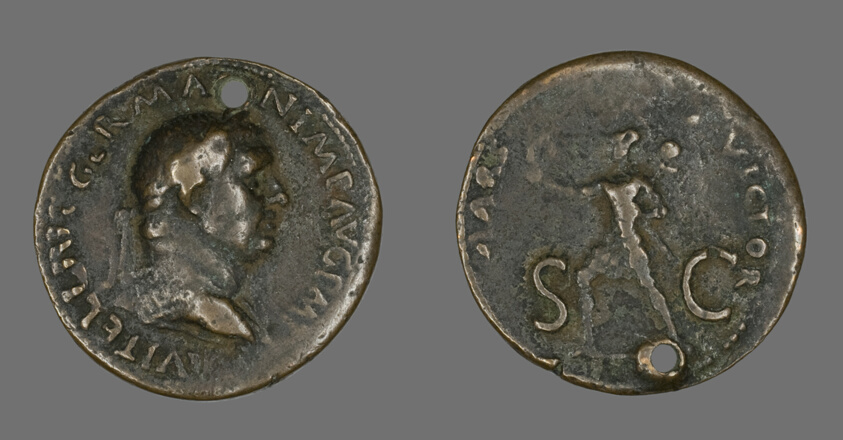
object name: Coin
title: Sestertius (Coin) Portraying Emperor Vitellius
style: imperial (roman), ancient, roman (ancient, style or period)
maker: Roman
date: 69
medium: Bronze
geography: Roman Empire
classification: coin; ancient art